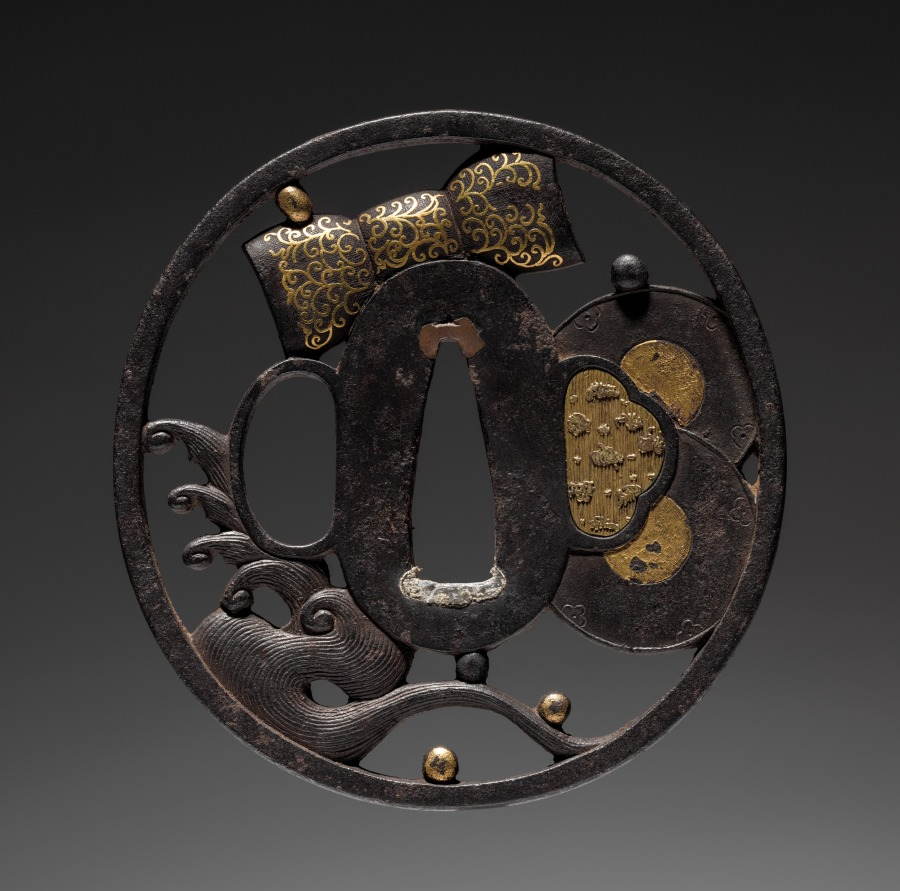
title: Sword Guard (Tsuba) with Drum in Waves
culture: Japan, possibly Edo period (1615-1868)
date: c. 1615–1868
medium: iron with gold inlay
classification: Arms and Armor